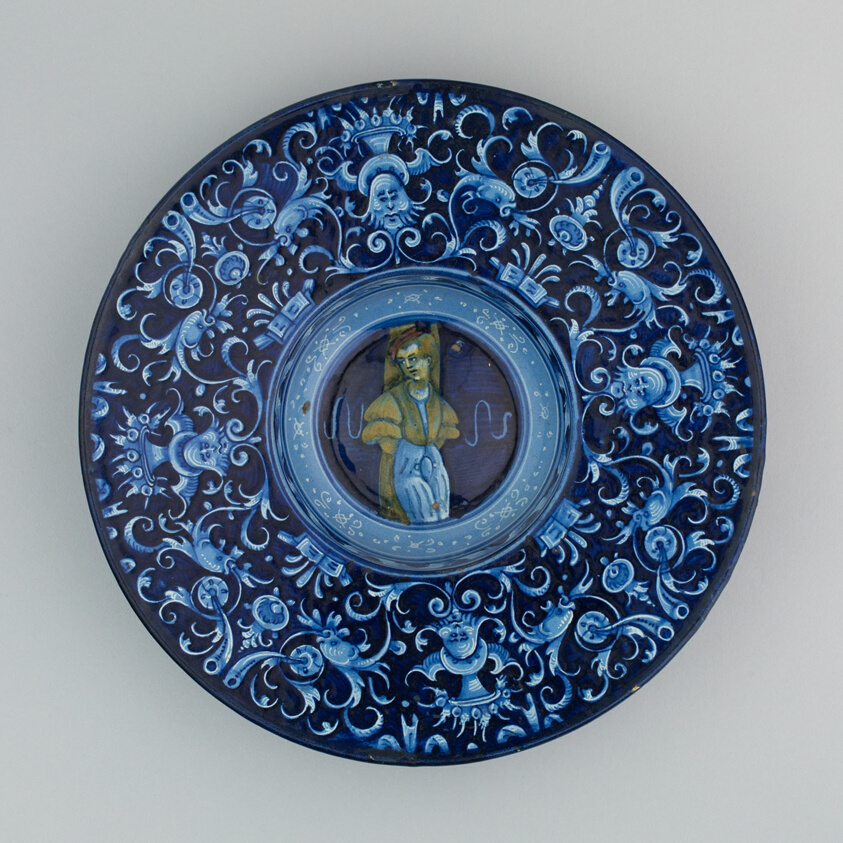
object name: Ceramics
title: Plate with a Youth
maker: Italian; Faenza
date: c. 1530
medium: Tin-glazed earthenware (maiolica)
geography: Faenza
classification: earthenware; european decorative arts; ceramics; decorative arts